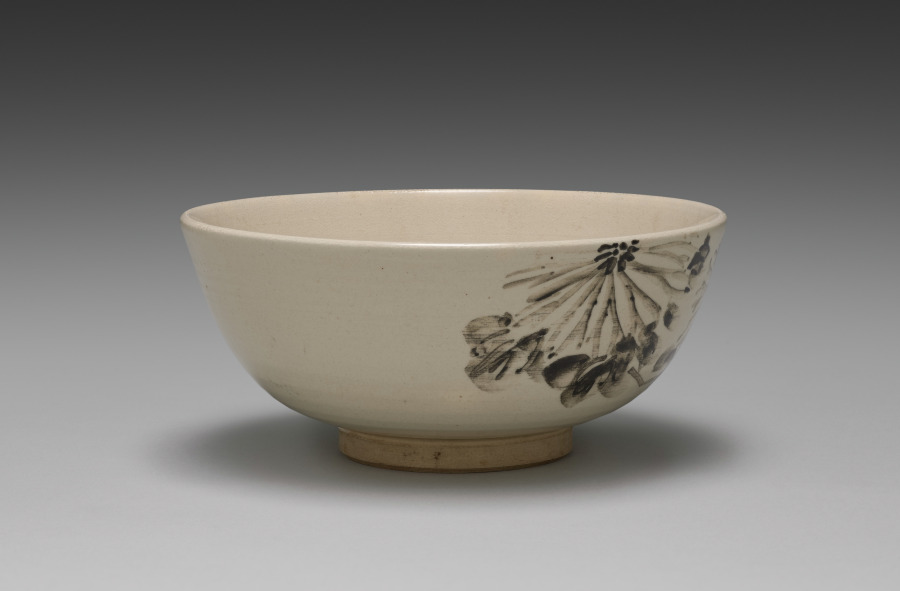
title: Bowl with Chrysanthemums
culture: Japan, Taishō period (1912–26) or Shōwa period (1926–89)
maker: Seifū Yohei IV (Japanese, 1872–1951)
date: 1914–46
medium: Stoneware with underglaze iron oxide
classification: Ceramic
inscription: 清風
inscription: 菊画/ 鉢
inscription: The inside of the box lid has a seal indicating that the bowl was included in a renewal opening of the gallery Manjudo in Tokyo.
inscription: 清風造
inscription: 成山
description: The chrysanthemums in underglaze iron oxide of this bowl of Kyoto ware have a casual feel, which is emphasized by the bowl's shape. When held, the its slightly ridged body would gently massage one’s palms, contributing to the sensory, tactile experience of the piece and possibly generating a sense of comfort and ease. The inside of the box lid has a seal indicating that the bowl was included in a renewal opening of the gallery Manjudo in Tokyo.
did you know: Stoneware works of this type are classified as Kyoto ware, after the city where the style developed.